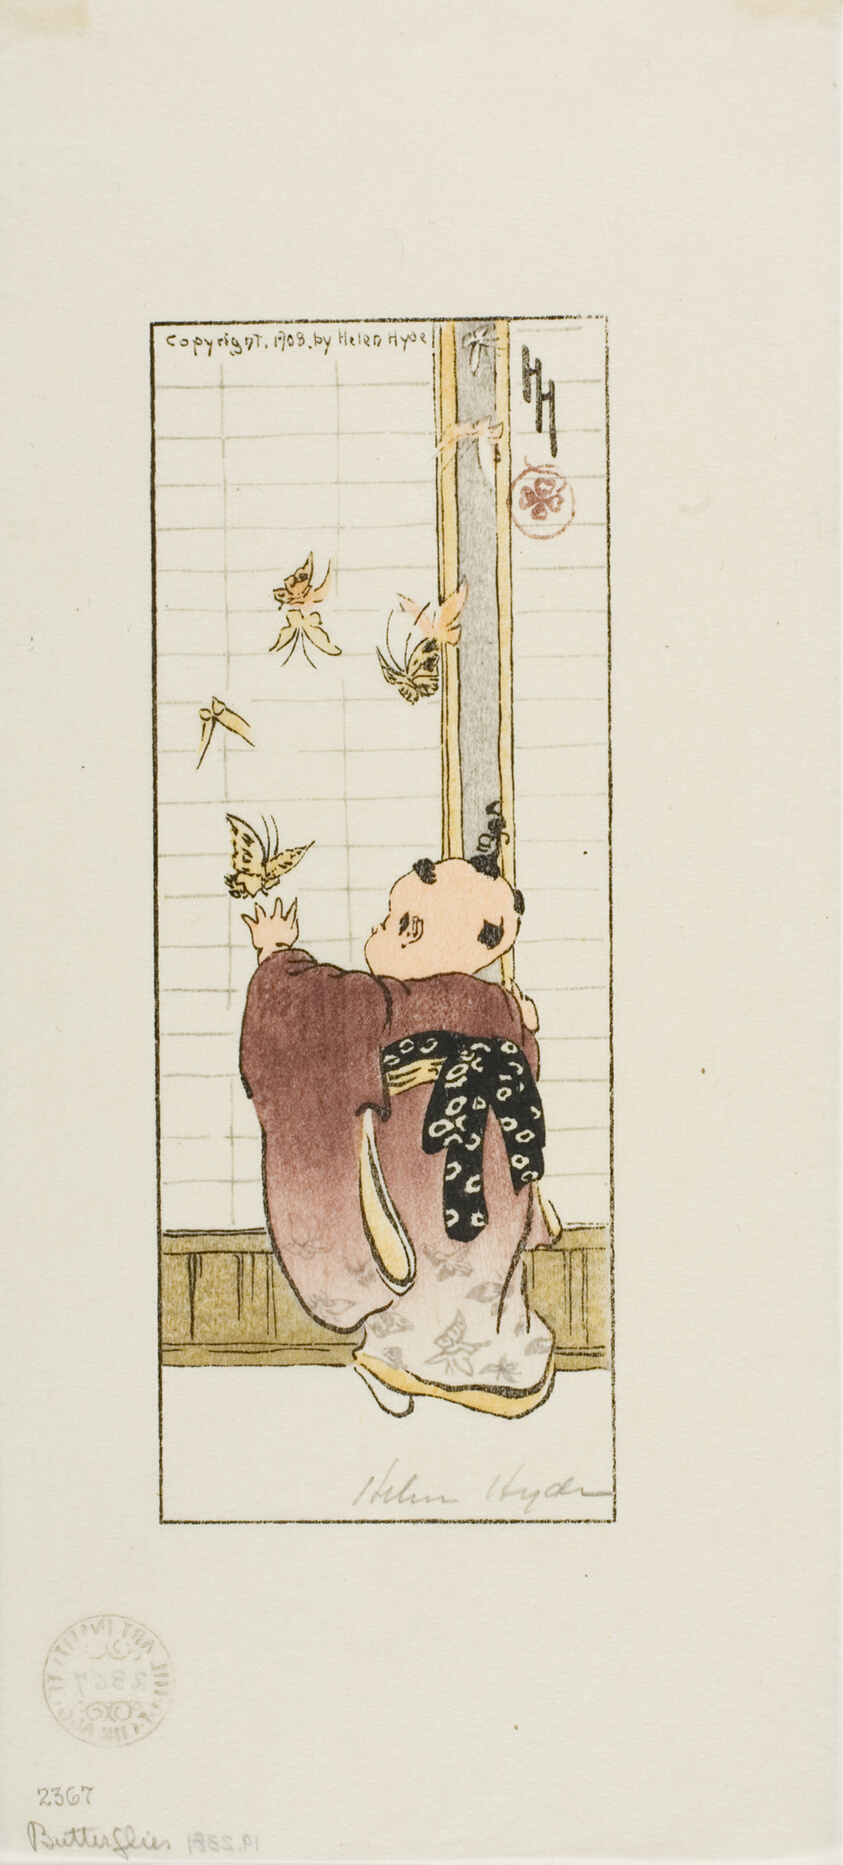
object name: Print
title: Butterflies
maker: Helen Hyde (American, 1868-1919)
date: 1908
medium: Color woodcut on ivory Japanese paper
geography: United States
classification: woodcut; print; prints and drawing